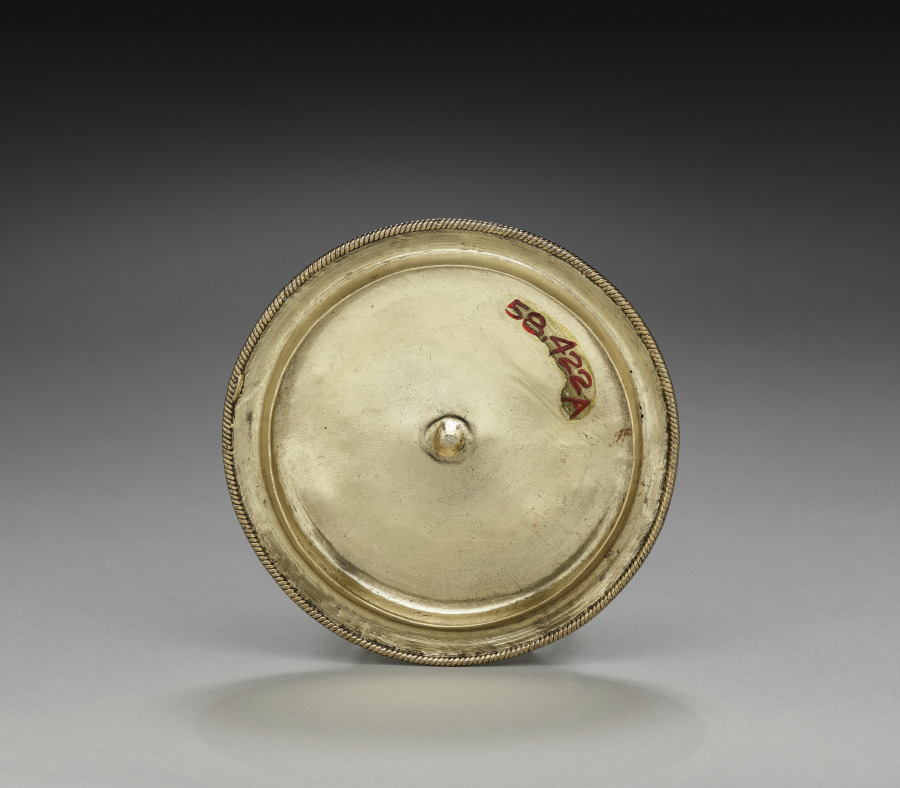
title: Cover for a Two-Handled Cup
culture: England, London, 17th century (Charles II)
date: 1677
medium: silver and silver gilt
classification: Silver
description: Due to its size and ornament, the vessel accompanying this lid may have functioned as a caudle cup, containing a mixture of ale or wine and bread, oatmeal, eggs, sugar, and spices that was given to women after childbirth to help them regain their strength. The scrolling foliage and exotic birds along the exterior of the cup were likely based on prints circulating in the 1600s. The reclining female figures capping the handles and the acanthus bud finial on the lid recall common architectural motifs.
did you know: This is a lid for a two-handled cup. See cover record.